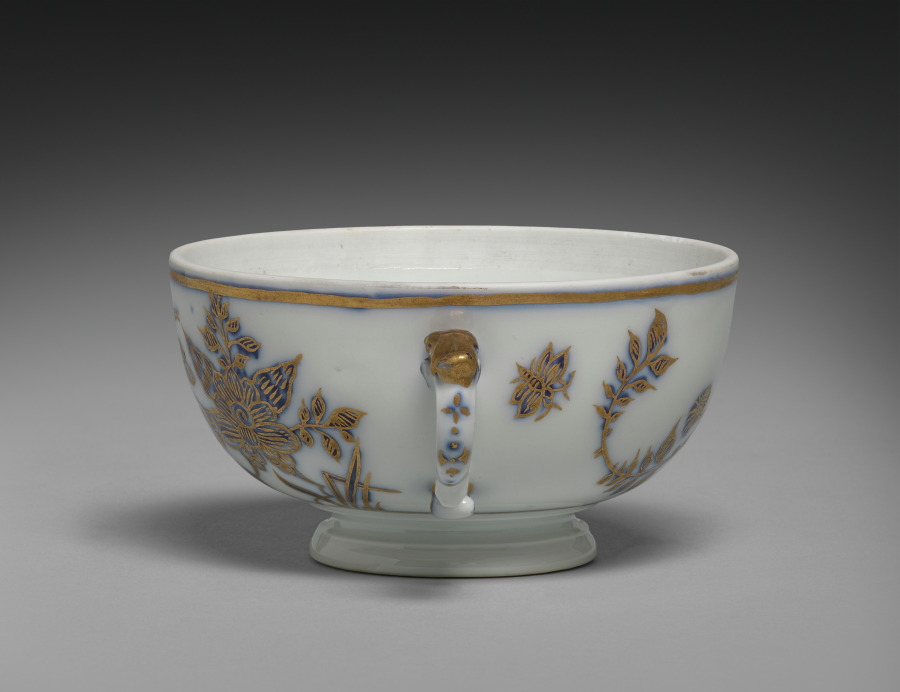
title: Broth Bowl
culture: Germany, Meissen, 18th century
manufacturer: Meissen Porcelain Factory (German, est. c. 1710)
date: 1730–40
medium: gilt porcelain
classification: Ceramic